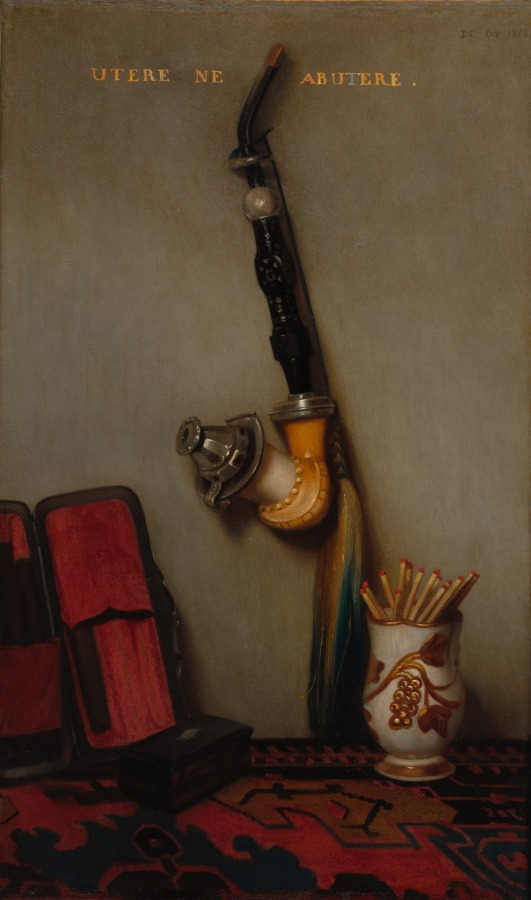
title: Still Life with Pipe and Matches and Still Life with Herring, Bread, and Cheese (pair)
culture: France, 19th century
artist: Alexandre-Gabriel Decamps (French, 1803–1860)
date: 1858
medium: oil on fabric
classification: Painting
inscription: Signed lower left: dc; upper right: dc rev 1858; inscribed above: utere ne abutere [Use, not abuse]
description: The artist was a smoker. In this composition the place of honor is given to a pipe made in Austria around the middle of the 19th century. It is made of precious materials—meerschaum, silver, amber, horn or lacquered wood—that are carefully fashioned, all lovingly rendered by the artist. The cord with a tassel (perhaps of horsehair) is not just a decorative element, it is a security measure in case the precious bowl of the pipe becomes detached from the pipe stem. The pipe is surrounded by ordinary smoker's accessories—a cigar case, a snuffbox, and a match holder in porcelain—all placed on a Turkish rug. The Latin inscription translates: "Use, not abuse." In 1858 Decamps was 55 years old and not in the best of health. Perhaps a doctor had advised him to reduce his consumption of tobacco.